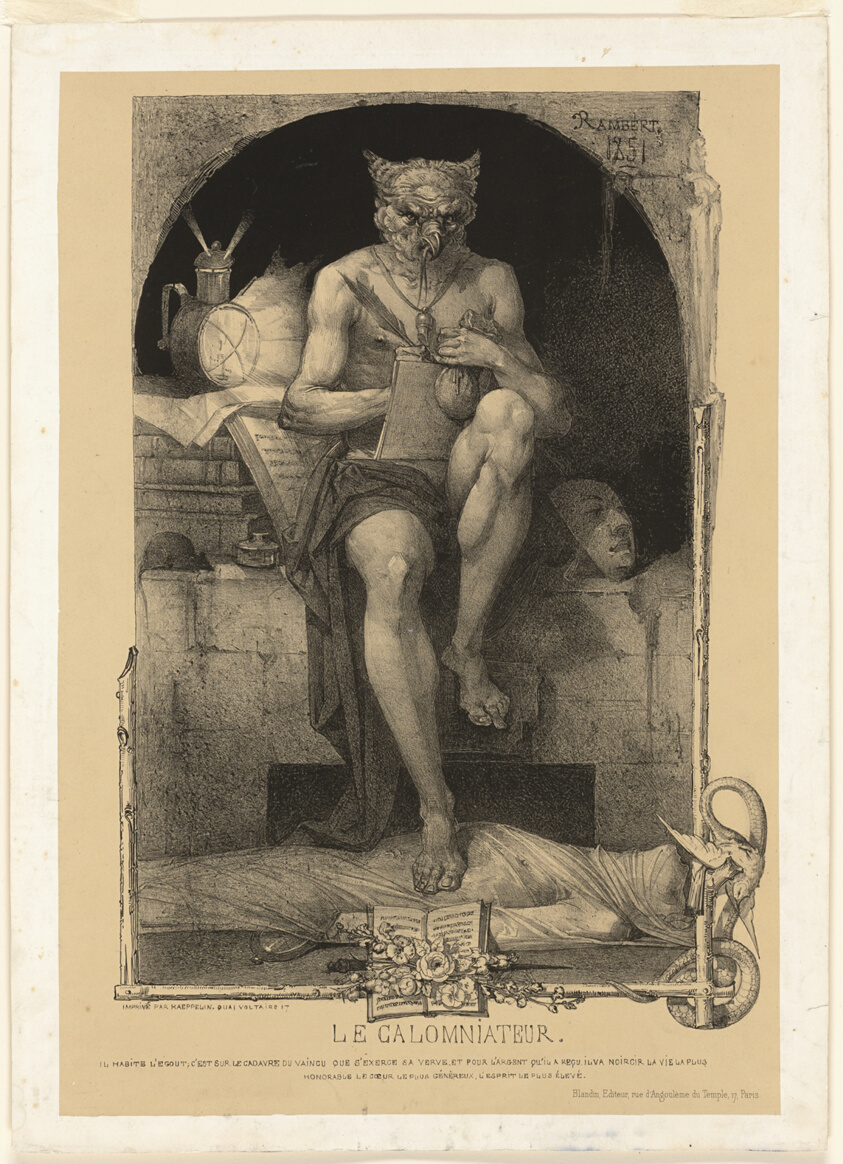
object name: Print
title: The Slanderer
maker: Charles Rambert (French, active c. 1836-1867, died before 1899); printed by Kaeppelin; published by Blandin, éditeur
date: 1851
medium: Lithograph, possibly from a zinc plate, or zincograph, in black crayon, pen and ink, scraping and tusche on tan wove paper laid, down on off-white wove paper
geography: France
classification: lithograph; print; prints and drawing